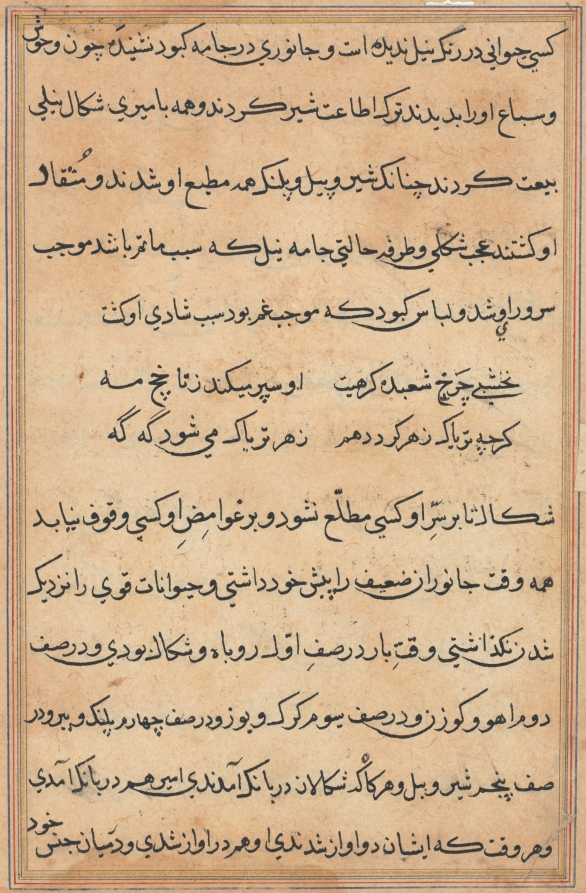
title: Page from Tales of a Parrot (Tuti-nama): text page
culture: Mughal India, court of Akbar (reigned 1556–1605)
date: c. 1560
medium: gum tempera, ink, and gold on paper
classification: Painting